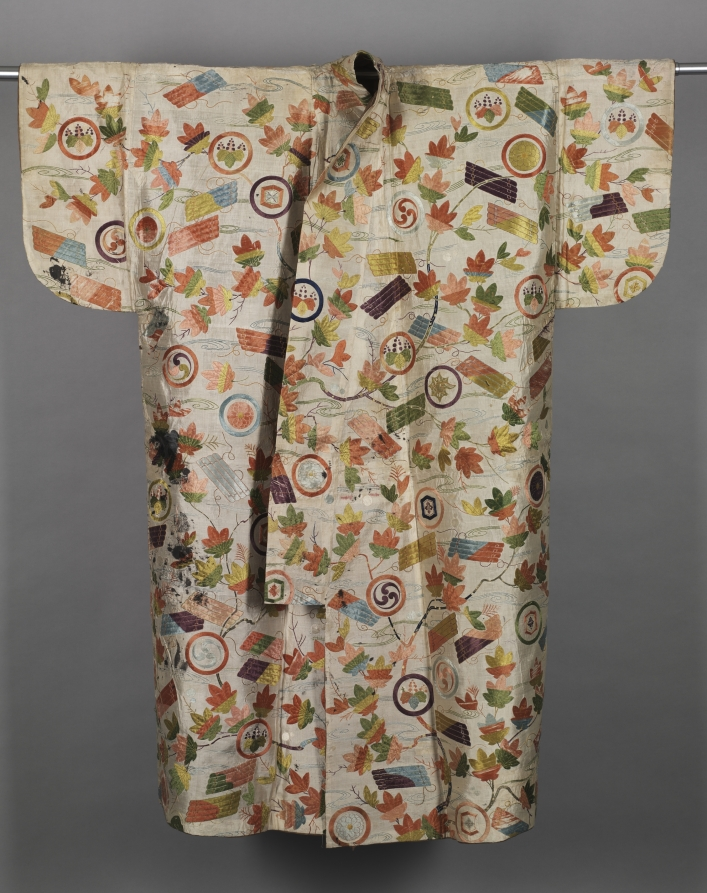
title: Noh Robe (Karaori)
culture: Japan, Momoyama period (1573–1615)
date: c. 1600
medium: embroidered silk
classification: Garment